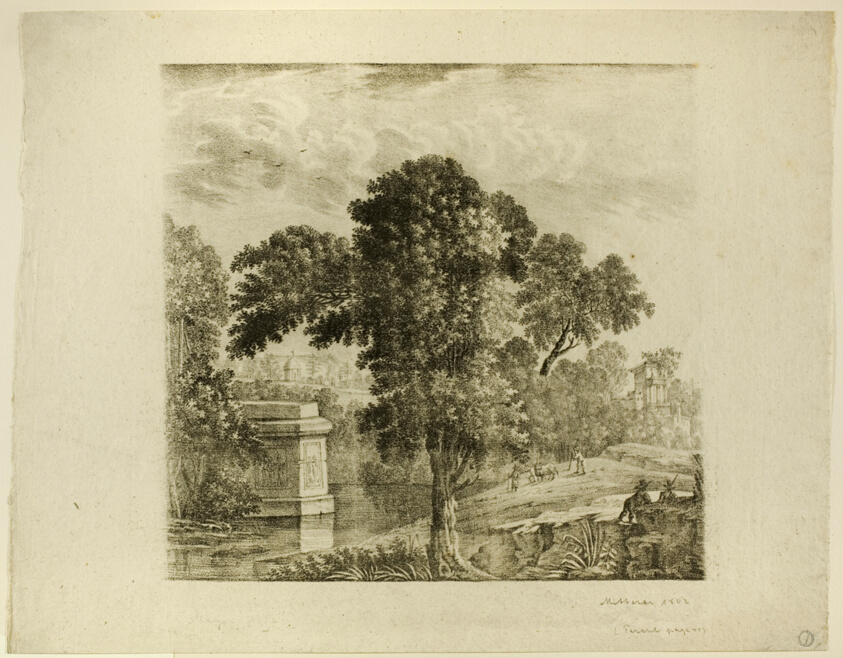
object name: Print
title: Landscape with Tree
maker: Mitterer (Unknown, 19th century); Style of Claude Lorrain (French, 1600-1682)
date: 1802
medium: Lithograph in black on paper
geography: France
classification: lithograph; print; prints and drawing